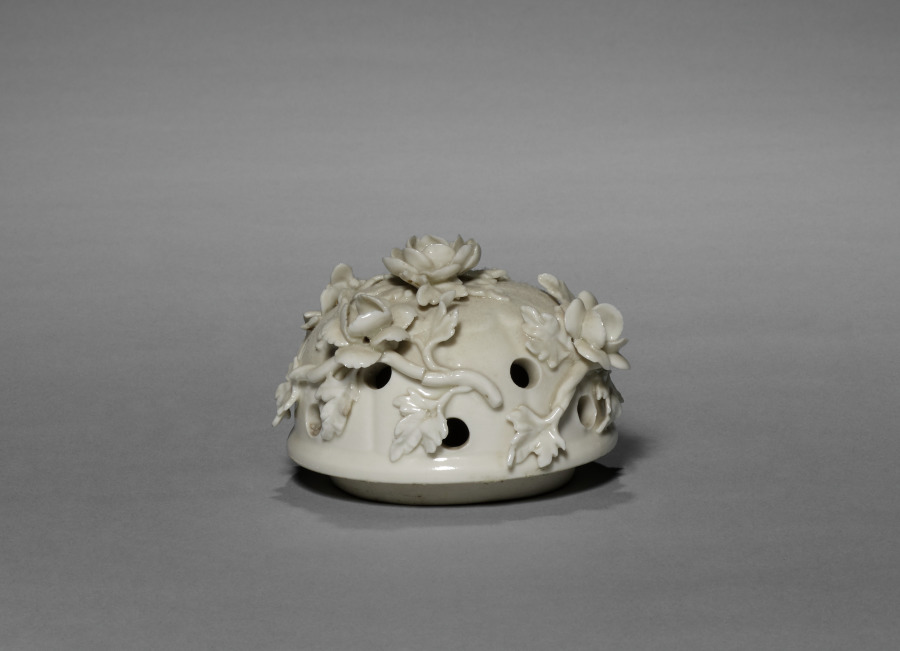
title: Cover for a Potpourri Vase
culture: France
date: 1860–1880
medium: blanc-de-chine porcelain; gilt bronze mount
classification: Ceramic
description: This cover is part of a pair of covered vases that were created to contain potpourri, a mixture of flowers, herbs, and spices emitting ambient fragrance. This specific function offered a particularly fertile ground for the development of French porcelain from the mid-1700s, as manufactories experimented with forms, surface ornamentations, and placement of perforations. Produced by the firm of Edmé Samson in the 1800s, the vases pay homage to this history. While using updated technique and material, as well as more exuberant decorations, these vases draw upon designs by earlier innovators such as the Saint-Cloud manufactory.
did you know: Potpourri vases always have holes in the top to let the scent of dried spices and flowers contained within freshen the air around them.